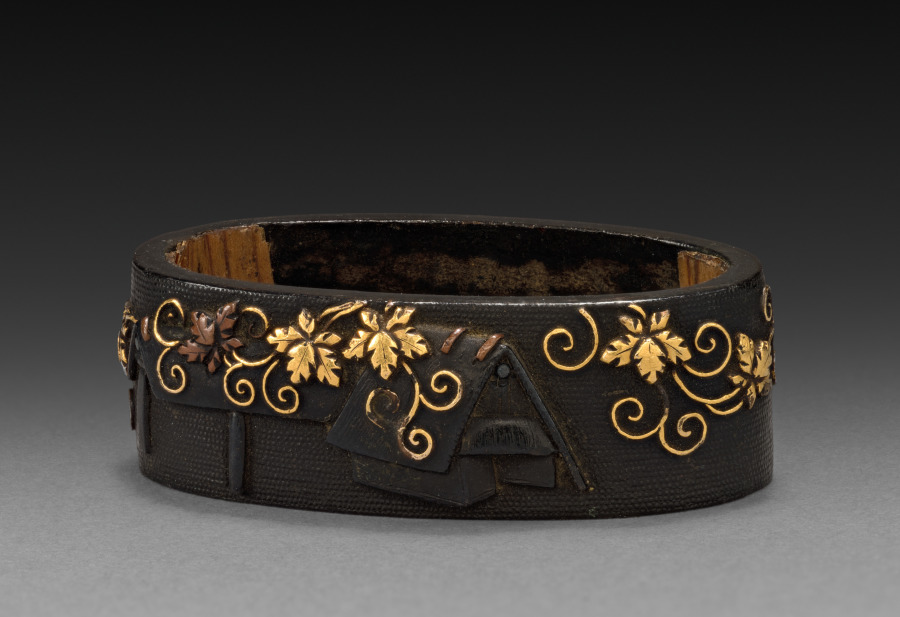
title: Sword-Hilt Collar (Fuchi)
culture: Japan, Edo period (1615–1868)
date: 1700–1850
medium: shakudo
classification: Arms and Armor